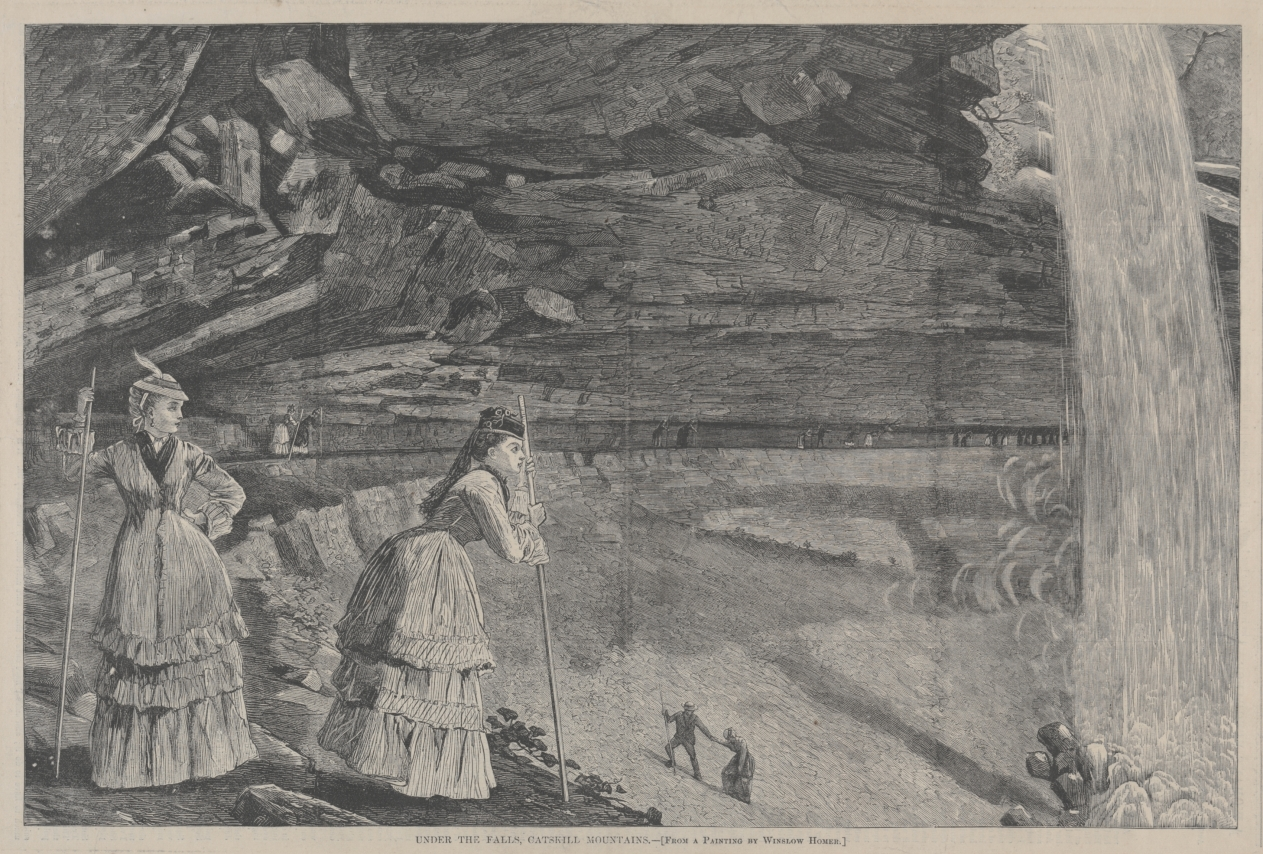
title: Under the Falls, Catskill Mountains From a Painting by Winslow Homer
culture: America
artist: Winslow Homer (American, 1836–1910)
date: 1872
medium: wood engraving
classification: Print